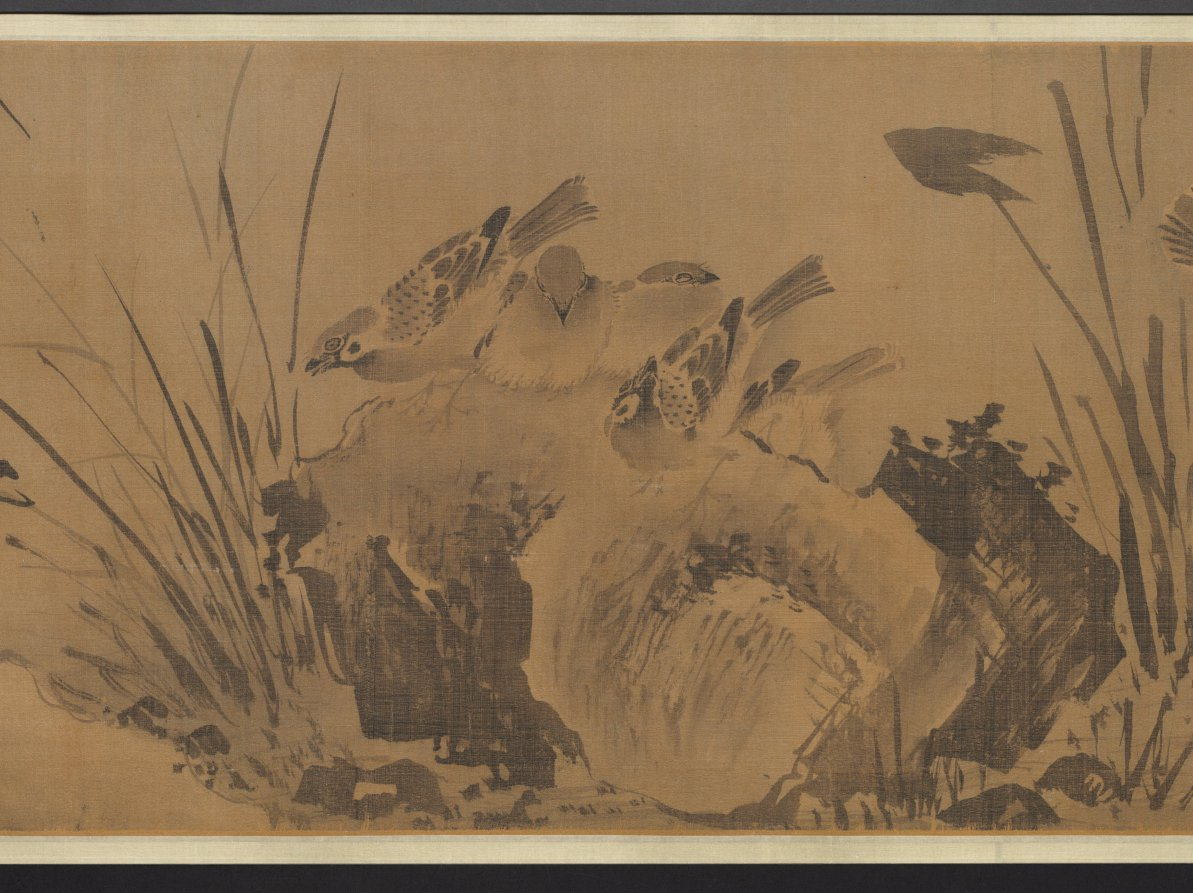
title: A Hundred Sparrows in a Lofty Grove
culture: China, Ming dynasty (1368–1644)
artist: attributed to Lin Liang (Chinese, 1416–1480)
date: 1368–1644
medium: handscroll; ink on silk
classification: Painting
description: Sparrows engaged in all kinds of activities frolic amid leafy branches, blades of grass, rocks, and a waterfall. As our eyes move over the scroll, the artist engages us in enjoying the sparrows’ carefree movements in a natural setting. The charming birds were painted from close observation in swift and fluent brushstrokes. Sparrows are a common bird and in Chinese painting they often represent the commoner in human society as opposed to the noble pheasant or peacock representative of the ruling class.